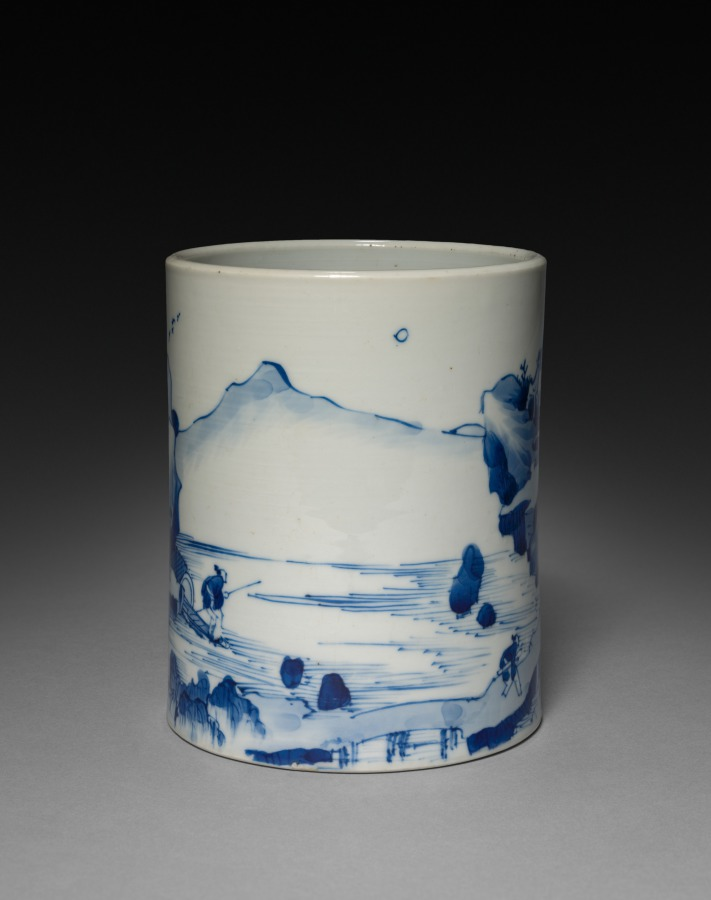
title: Brush Pot with Landscape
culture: China, Jiangxi province, Jingdezhen kilns, Qing dynasty (1644-1911), Kangxi reign (1662-1722)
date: 1662–1722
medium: porcelain with underglaze blue decoration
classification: Ceramic